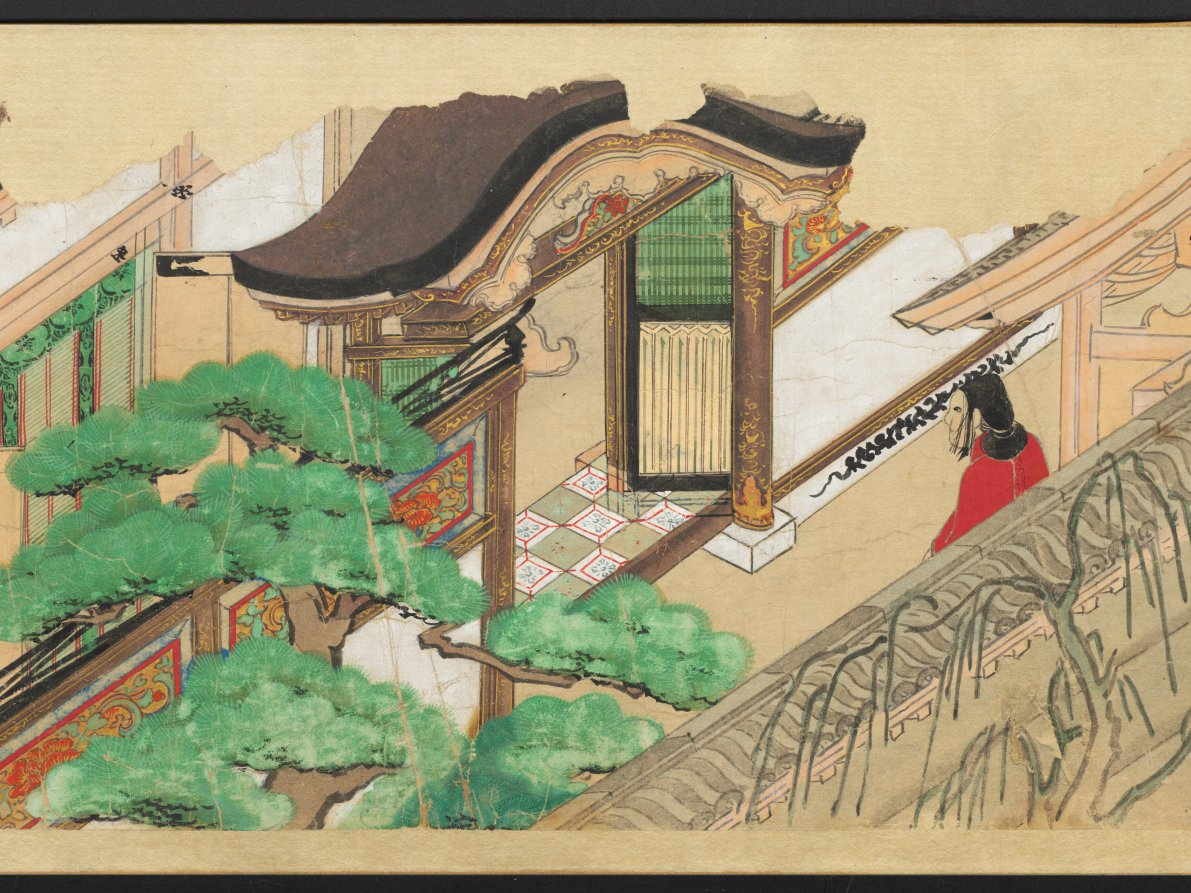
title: The Saltmaker's Story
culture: Japan, Edo period (1615–1868)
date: early 1600s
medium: One of a pair of handscrolls; ink, color, and gold on paper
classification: Painting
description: Once read and copied by girls at New Year’s celebrations and included in dowries, The Saltmaker’s Story is a rags-to-riches tale in which daughters are gifts from the gods. Despite his simple outlook, the main character progresses from humble roots as an associate at Kashima Shrine to the elite status of grandfather of the emperor through the intervention of the Kashima deity. The Saltmaker’s Story is traditionally presented in a set of three scrolls, but the text of this set has been removed by a previous owner, who remounted the illustrations as a pair. The paintings of this one take us from right to left through the second half of the tale.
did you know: This handscroll originally had texts before its paintings, but the texts were removed.